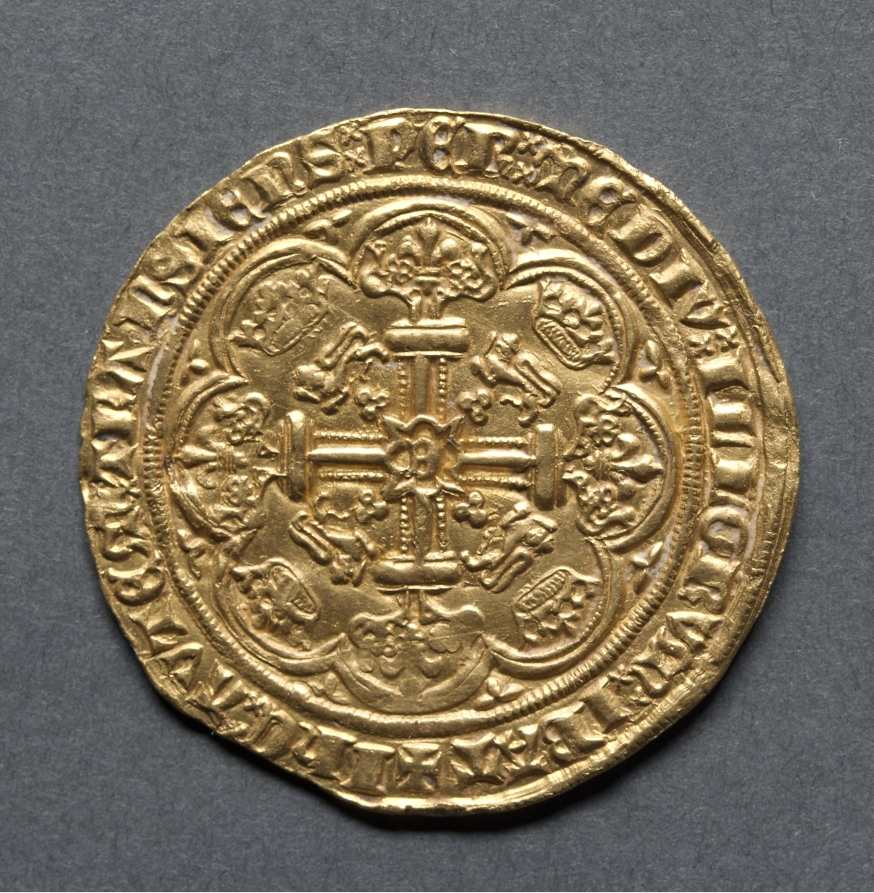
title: Noble: Ornamental Cross with Lis Terminals (reverse)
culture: England, Edward III, 1327-1377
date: 1363–1369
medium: gold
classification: Coins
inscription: IHC. AVTEM TRANSIENS PER MEDIV. ILLORVM IBAT